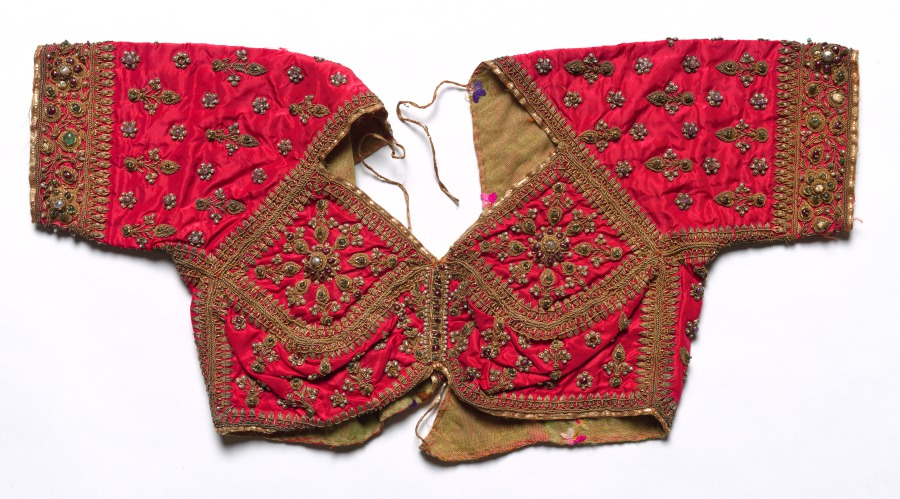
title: Child's Bodice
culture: India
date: early 1900s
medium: satin: embroidery decorated with gold thread, pearls, and glass beads(?)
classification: Garment